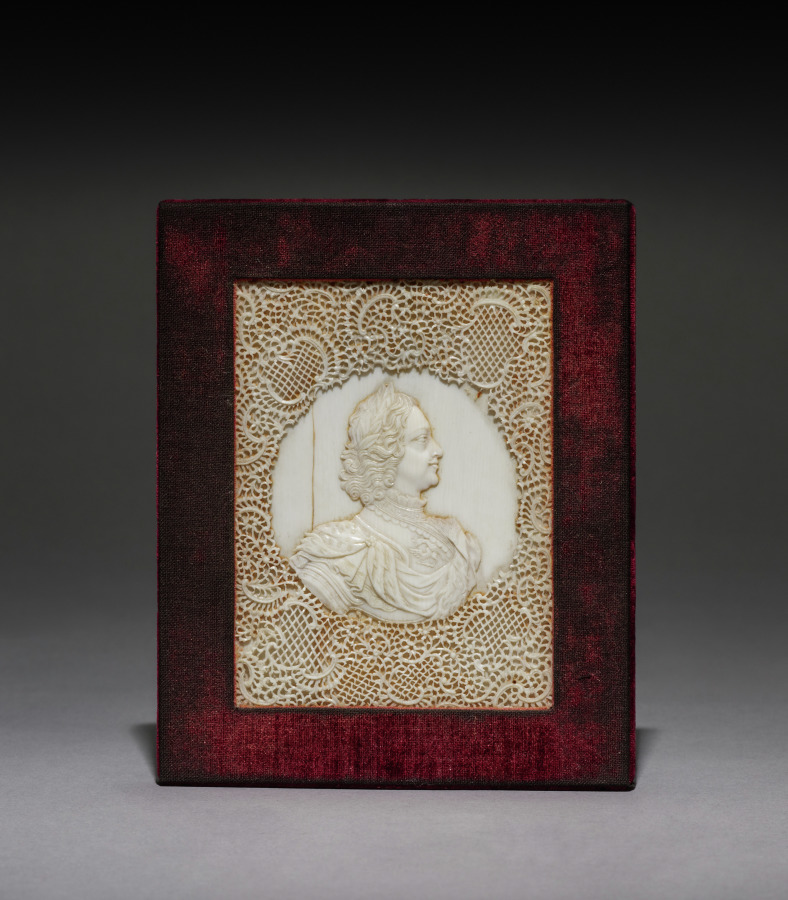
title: Portrait of Peter the Great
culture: Russia, Kholmogory School, 18th century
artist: Kholmogory School (Russian)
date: c. 1770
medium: ivory or bone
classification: Ivory